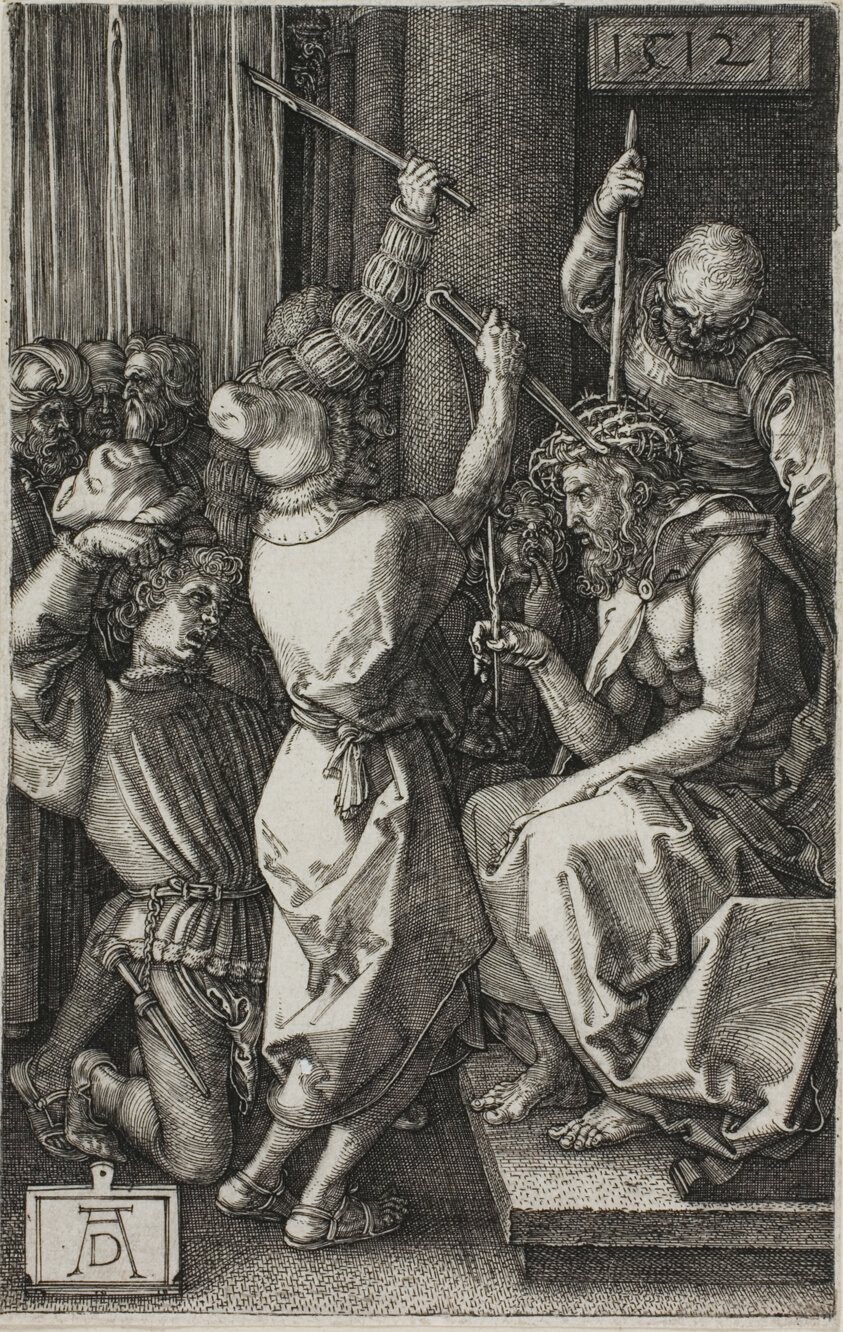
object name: Print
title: Christ Crowned with Thorns, from The Engraved Passion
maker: Albrecht Dürer (German, 1471-1528)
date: 1512, published 1513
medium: Engraving in black on ivory laid paper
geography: Germany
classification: engraving; print; prints and drawing; paper